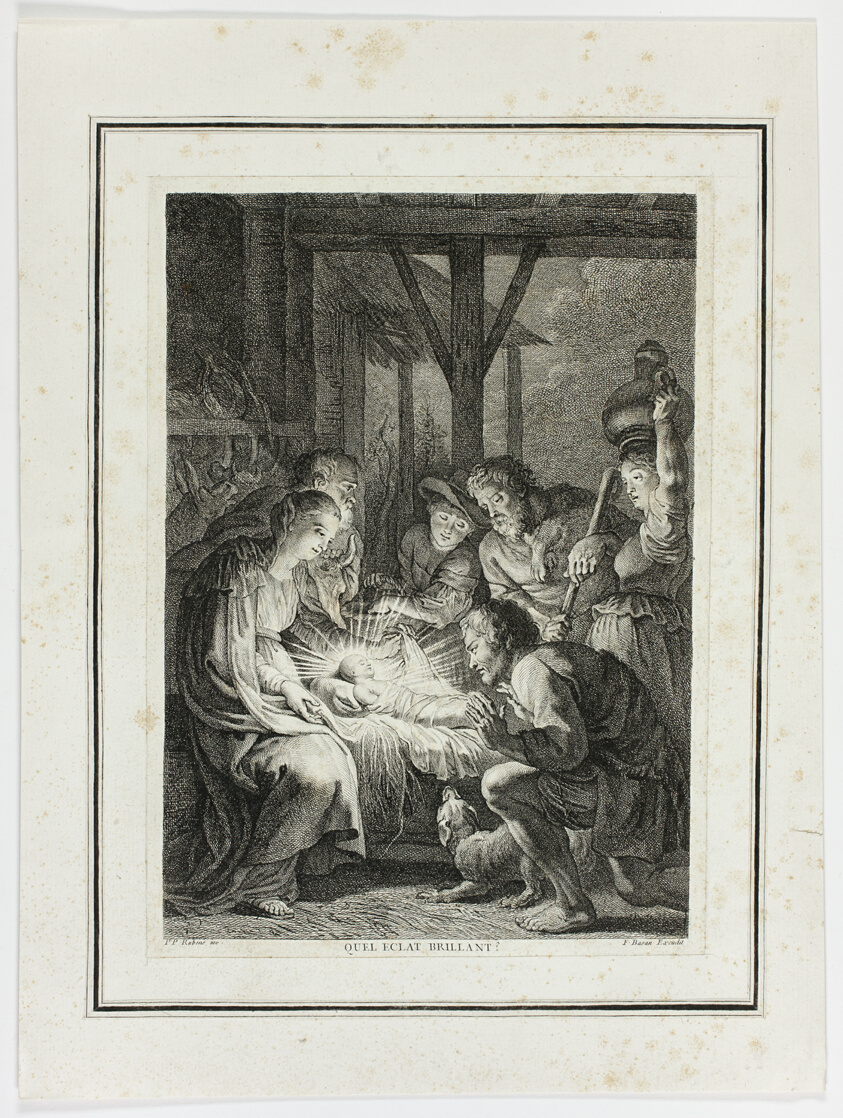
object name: Print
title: Adoration of the Shepherds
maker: Pierre-François Basan (French, 1723-1797); after Peter Paul Rubens (Flemish, 1577–1640)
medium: Engraving in black on ivory laid paper, laid down on ivory laid paper with an ivory laid paper collar, decoated with ruled pen and black ink lines on strips of ivory laid paper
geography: France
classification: engraving; paper; print; prints and drawing